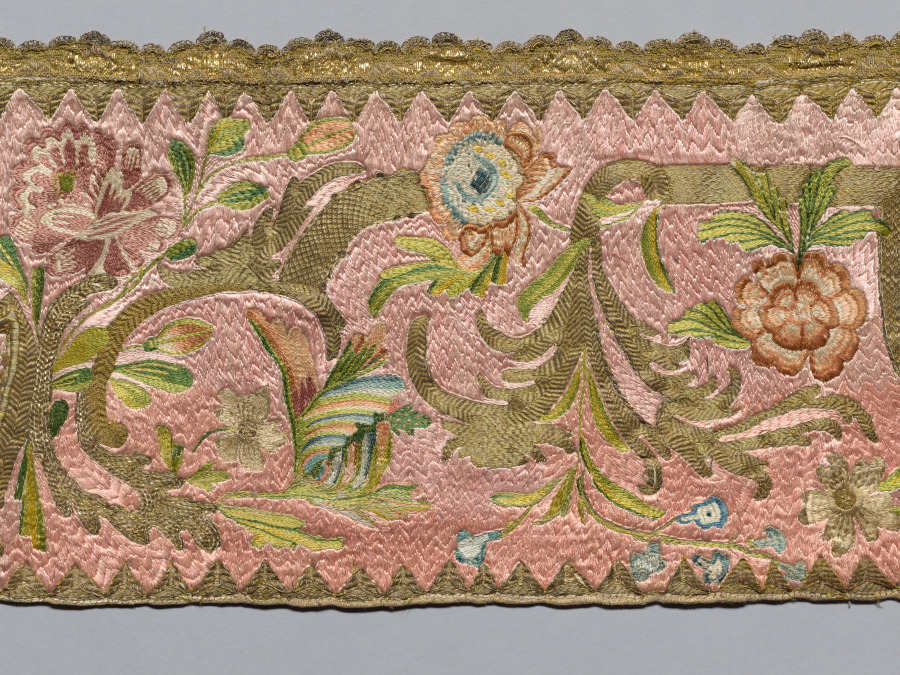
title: Embroidered Strip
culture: Italy, 18th century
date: 1700s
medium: embroidery, silk and gold thread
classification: Embroidery